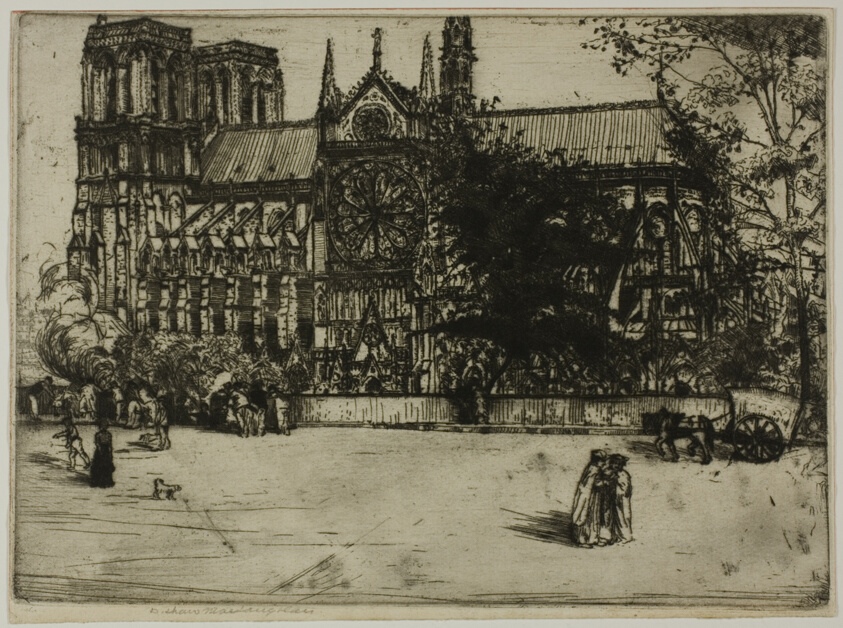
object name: Print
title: Notre Dame, Paris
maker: Donald Shaw MacLaughlan (American, born Canada, 1876-1938)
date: 1900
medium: Etching in black on cream laid paper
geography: United States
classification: etching; print; prints and drawing